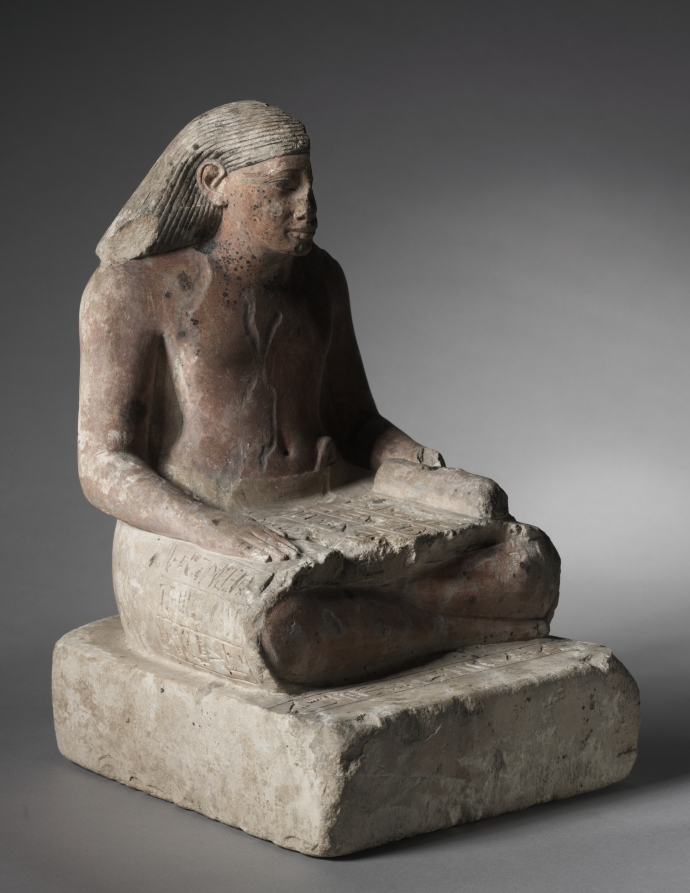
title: Seated Scribe of Medthu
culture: Egypt, New Kingdom (1540–1069 BCE), Dynasty 18, reign of Tuthmosis III (1479–1425 BCE)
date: c. 1479–1425 BCE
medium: limestone, originally painted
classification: Sculpture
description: Medthu, the overseer of the two granaries and scribe of accounts of the fields of Amen, sits cross-legged on the ground in the traditional pose of a scribe. His striated, bell-shaped wig, the stripes of which run parallel to his forehead, completely reveals his ears and passes behind his shoulders. His short, belted kilt is stretched tight to support he papyrus that is partly unrolled across his lap. He holds the rolled-up portion with his left hand, and his right hand rests flat on the papyrus, which curls around his right thigh. The papyrus is inscribed in sunk relief with seven columns of hieroglyphs that face the scribe. The Middle Kingdom type of wig helps date the statue more closely to the earlier part of Dynasty 18, around the time of Tuthmosis III. Later in Dynasty 18 the coiffure was fashionably updated.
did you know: The scribe statue has a long and distinguished history, having first appeared in Dynasty 4 (c. 2613 to 2494 BC).